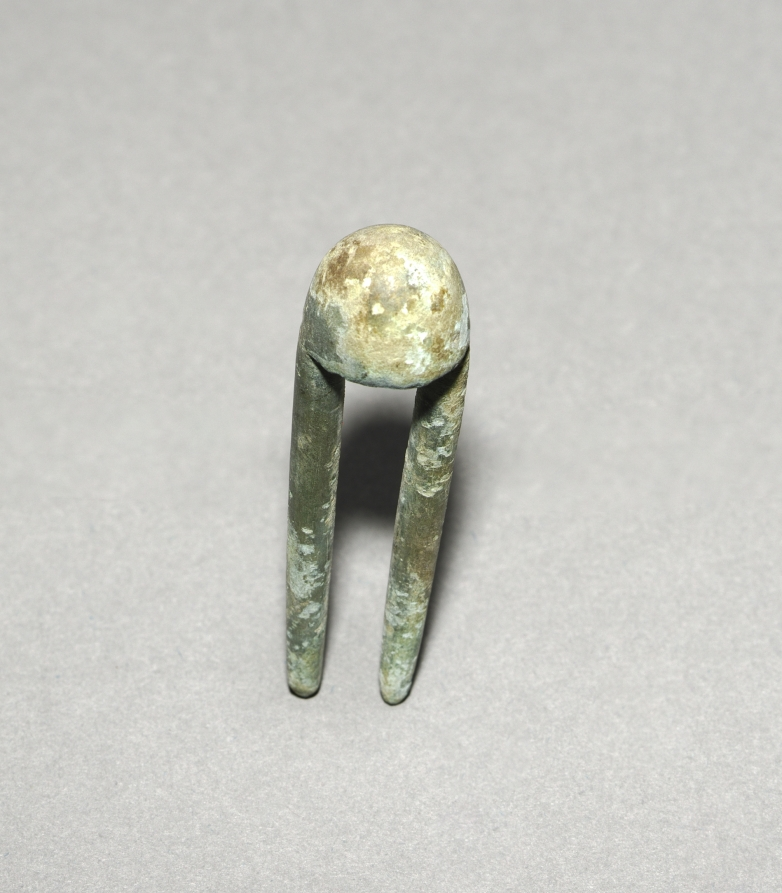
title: Topknot Pin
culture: Korea, Goryeo dynasty (918–1392)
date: 918–1392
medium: bronze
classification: Metalwork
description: Metallurgy advanced remarkably in the Goryeo period (918-1392), explaining why a large quantity of sophisticated metal artifacts were used not only as daily accessories but also as burial goods. Men put their hair in a knot at the top of their heads. To keep their long hair from falling, a bronze pin such as this one was used.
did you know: This bronze hairpin was for a man to fix his topknot.